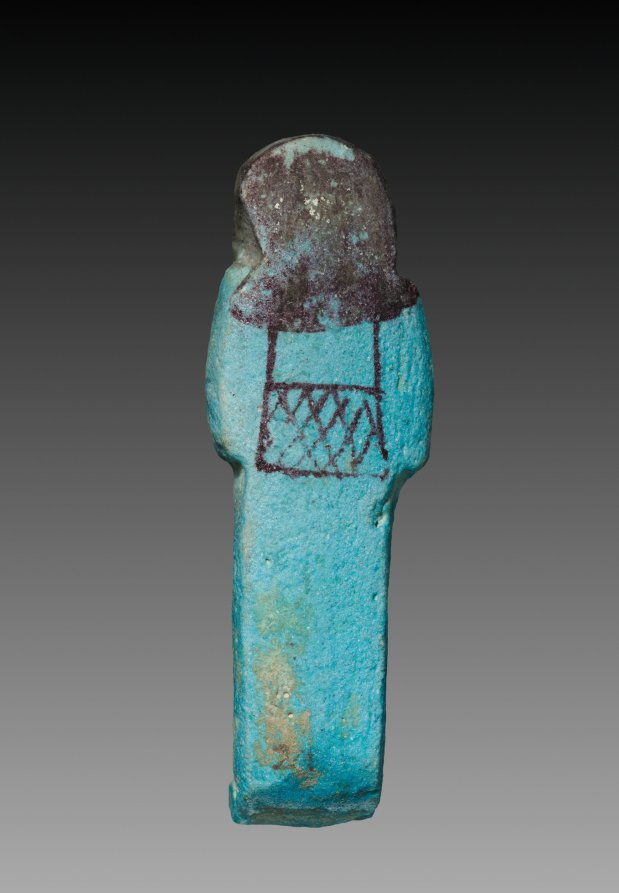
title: Shawabty of Meritamen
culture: Egypt, Third Intermediate (1069–715 BCE), Dynasty 21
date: 1000–956 BCE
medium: turquoise faience with dark purple decoration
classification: Funerary Equipment